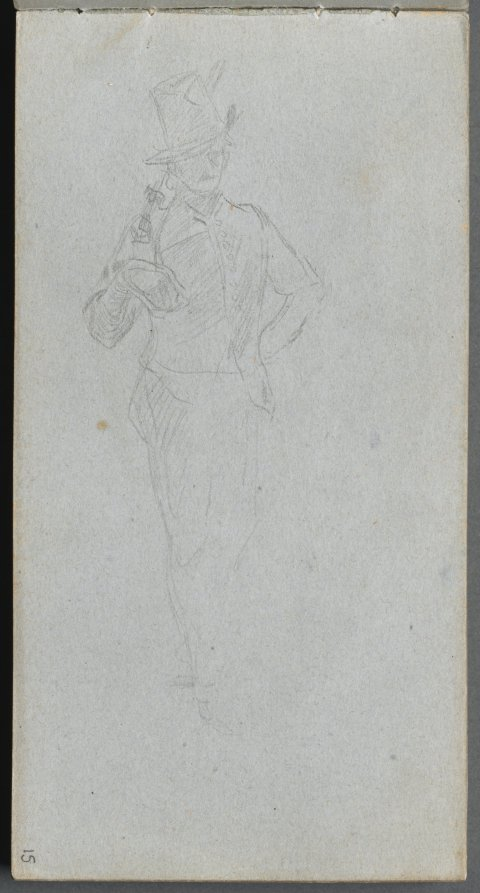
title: Sketchbook, page 15: Study of a Soldier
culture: France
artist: Ernest Meissonier (French, 1815–1891)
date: c. 1860s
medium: graphite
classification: Bound Volume